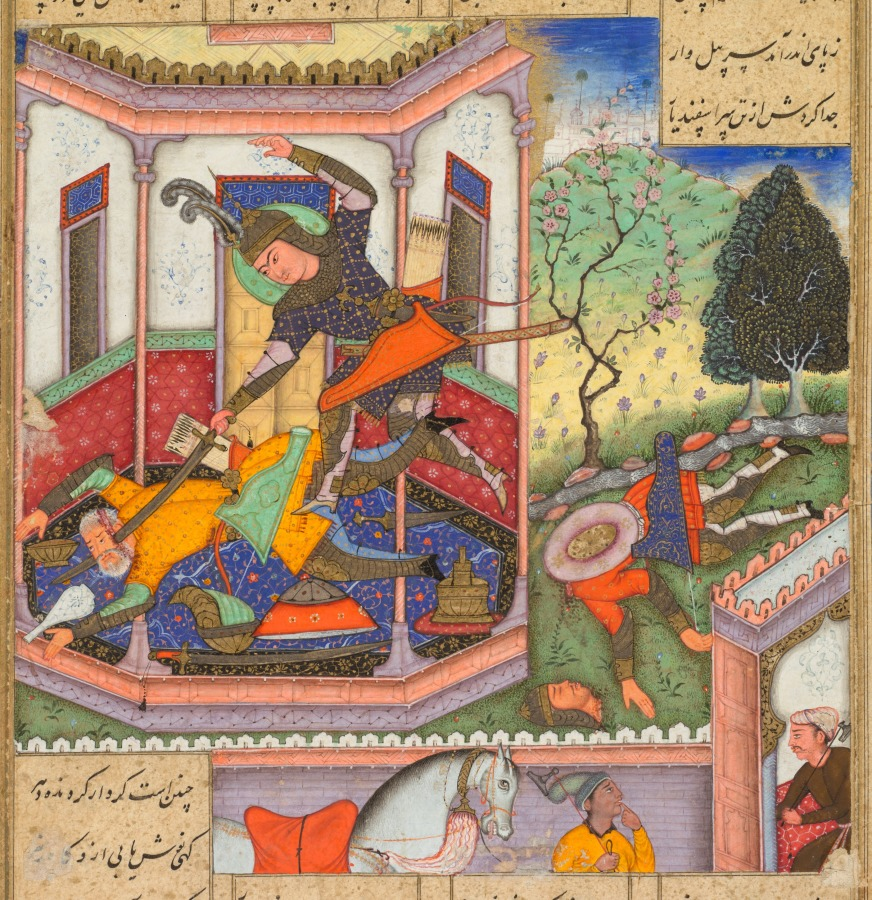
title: Isfandiyar slays Arjasp, the king of Turan, from a Shah-nama (Book of Kings) of Firdausi (Persian, about 934–1020)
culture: Mughal India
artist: Haidar Kashmiri (Indian, active late 1500s-early 1600s)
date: 1600–1605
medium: Gum tempera, ink, and gold on paper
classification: Painting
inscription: Persian inscription in left margin, in nasta‘liq script: 25 / Haidar Kashmiri; Persian title in nasta‘liq script: The Battle of Isfandiyar with Arjasp and The killing of Arjasp by the hand of Isfandiyar; Persian text in nasta‘liq script: He uttered these words, and hurried away from them Toward Arjasp’s court, bent on revenge He went forth, grasping a blade of Indian steel, Whomever of the notables his eyes fell on, was killed on the way So that in passing through the royal hall Hard it was to pick one’s way: So many wounded, battered, and dead Had turned the ground into a turbulent sea. When Arjasp awoke from his sleep His heart was troubled on hearing the din That he could not make out in the bedchamber. He put on his mail shirt and Roman-fashioned helmet Clutching in hand a burnished dagger, He shouted loud, blood coursing through his heart. The warrior Isfandiyar confronted him. They fought beyond measure and scale, Exchanging daggers and swords in a furious feud At times targeting the head, at times the waist, To him he (Isfandiyar) said, “Now from the tradesman Will you receive the gift of a blade, one glittering like a silver denarius. I have it as a gift for you, worthy enough to come from Luhrasp, inlaid with Gushtasp’s seal. He made Arjasp go limp and lifeless by the delivered cuts Nowhere on his body did he leave untouched. His mammoth body toppled over His head severed from the body by Isfandiyar. Such is the conduct of the revolving fortune: At times it offers us a honeyed potion, at others a deadly poison Why tie your heart to this transient place Since you know that you will not stay forever, do not grieve and pine. Having dealt with Arjasp, Isfandiyar Gutted the palace, its smoke reaching as far as Saturn He ordered torches lit Setting fire to the palace from all sides He entrusted his (Arjasp’s) women’s quarters to a eunuch, Taking all luster away from the place. He sealed off the treasury No one in Turan was now equal to his fight. He went to the stables and mounted A blade of Indian steel in his hand He selected among the Arab horses there And ordered them saddled A hundred and sixty men rode away from there Handpicked riders for the day of battle.; Verso: Text of Isfandiyar slays Arjasp, the king of Turan: Persian inscription in bottom margin, in nasta‘liq script: The army realized Persian text in nasta‘liq script: [cont. from recto] He furnished mounts, moreover, for his sisters, And marched forth from the court-gate of Arjasp, But left a few Iranians, men of name, With noble Sawa in the hold. “When we,” He said, “have gone outside the walls, I and my noble warriors, to the plain, Secure the gate against the Turkman troops, And may my good star aid me. When ye think That I have joined our noble troops outside, Then—let the watchmen from the lookout cry: ‘Blessed be the head and crown of Shah Gushtasp.’ And when the Turkman troops come toward the hold, In flight retreating from the battlefield, Then you shall throw the head of King Arjasp Before them from the tower of the watch.” The valiant hero rushed upon the plain, And slaughtered all the Turkmans that he found. As he approached the troops of Bishutan They saw and praised him in amazement that he, Who was so young, should show such bravery. When the moon had left her silver throne, And when three watches of the night had passed, The watchman shouted lustily, proclaiming: “Gushtasp, the Shah, has gained the victory, And may Isfandiyar be ever young. May heaven, moon, and fortune be his helpers, Who has in vengeance for Luhrasp beheaded Arjasp and, adding luster to our Grace And customs, cast him down from throne to dust, And made the name and fortune of Gushtasp Resplendent.” Hearing such a cry the Turkmans All listened while Kuhram grew dark of heart By reason of that watchman, was astonished, And spoke thus to Andariman: “How clear This cry is in the night! What do you say Can be the cause? Let us consult, for who Would dare to bawl thus by the monarch’s couch And after dark? What tricks might such a one Play in the day of battle, and thus bring Our nobles into straits! So send and have His head cut off, whoever he may be. If one of our own household is our foe, And he is backing up our enemies. “With evil words and evil presages, Then will we brain him with an evil mace.” Now when the cry went on persistently Kuhram was stricken to the heart with anger Against the watchman whose utterance, spread abroad In such a fashion, filled the nobles’ ears. The soldiers said: “The shouts increase, beyond A watchman’s! Let us drive the foemen forth And after take this host” Kuhram, who was straitened At heart about that watchman, writhed and frowned. He told the troops: “These men have filled my heart With dread about the king. We must return At once, past question. What may happen after I know not.” So that night they left the field, Where Isfandiyar, with ox-head mace And wearing mail, pursued them. When Kuhram had reached The portal of the hold, and saw the Iranians Pursuing, “What is left us,” he exclaimed: “But to fight with brave Isfandiyar? Unsheathe and send your message by the sword.” But fortune frowned and those famed chiefs fared ill. The two hosts raged and smote each other's heads Till morning came, and then the chiefs of Chin Had had their day. Ascending to the ramparts The warriors of Isfandiyar inside The hold flung down therefrom the severed head Of brave Arjasp—the king that had slain Luhrasp. The Turkmans fought no longer; from their host Arose a cry, and all the troops unhelmed. The two sons of Arjasp wept and were consumed As in a fierce fire, while all the army knew What they must weep for on that evil day. (closely adapted from Warner and Warner 1912, 152)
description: This illustrated scene occurs early in the narrative of Isfandiyar, who is destined to serve as king of Iran with Rustam as his champion. The episode describes Isfandiyar’s quest for vengeance against the tyrant Arjasp of Turan, who had defeated his father in battle and taken his sisters captive. Isfandiyar disguised himself as a merchant, entered Arjasp’s fort, and then fought his way to the enemy king, whom he defeated in battle. The artist has included beautiful and delicate details of the garden and architectural setting of this gruesome scene. An onlooker below puts his finger to his mouth in a gesture of astonishment.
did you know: Wine spilling from a porcelain bottle heightens the action of the moment.